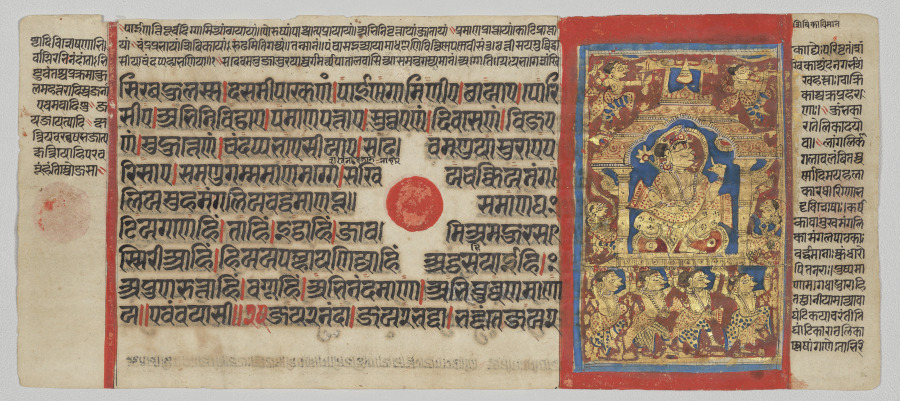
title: Mahavira Rides in His Initiation Palanquin, Folio 36 (recto), from a Kalpa-sutra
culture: Western India, Gujarat, last quarter of the 15th century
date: c. 1475–1500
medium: Gum tempera, ink, and gold on paper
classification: Painting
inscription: [[upper right]] śibikā vimāna